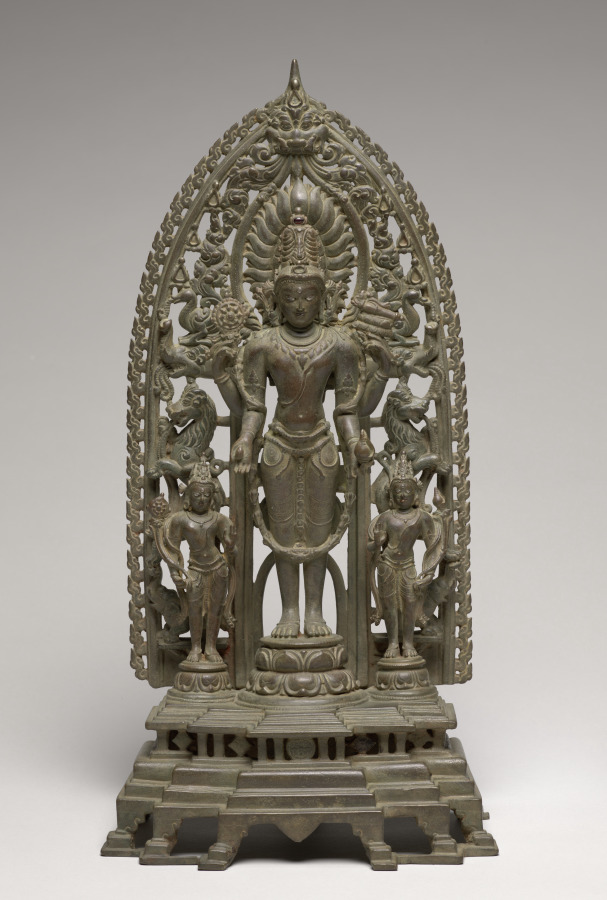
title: Vishnu Attended by Chakrapurusa and Shankhapurusa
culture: East India, Bengal, Pala period, 11th-12th century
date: 1000s–1100s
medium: bronze with silver inlay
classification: Sculpture